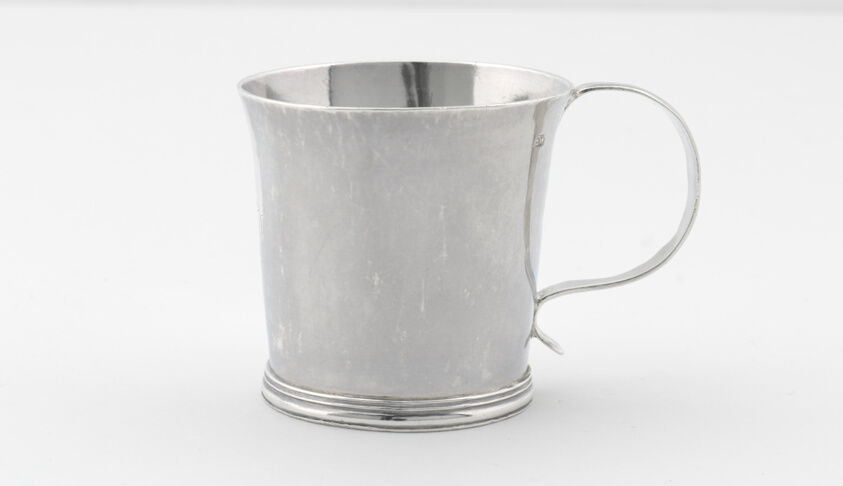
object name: Metalwork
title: Cup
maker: Edward Winslow; American, 1669–1743; Boston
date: c. 1715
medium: Silver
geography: Boston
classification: drinking vessel; silver; american decorative arts; american arts; decorative arts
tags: dining, drinking